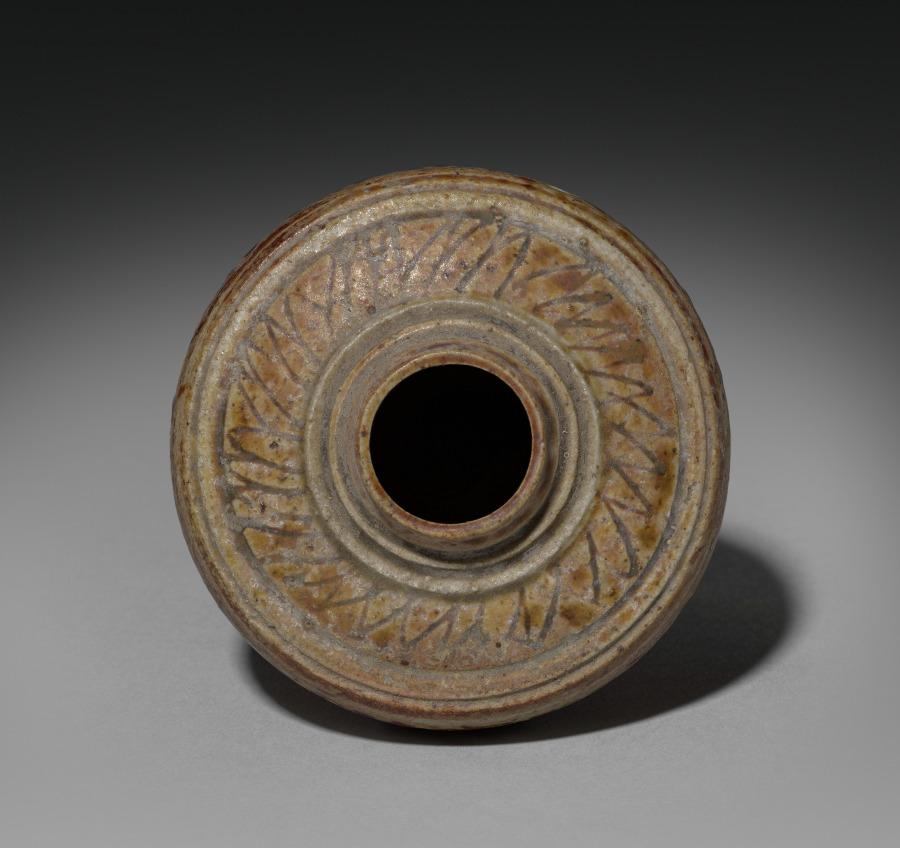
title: Bottle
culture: Siam, Sawankhalok ware, 15th century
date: 1400s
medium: stoneware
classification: Ceramic